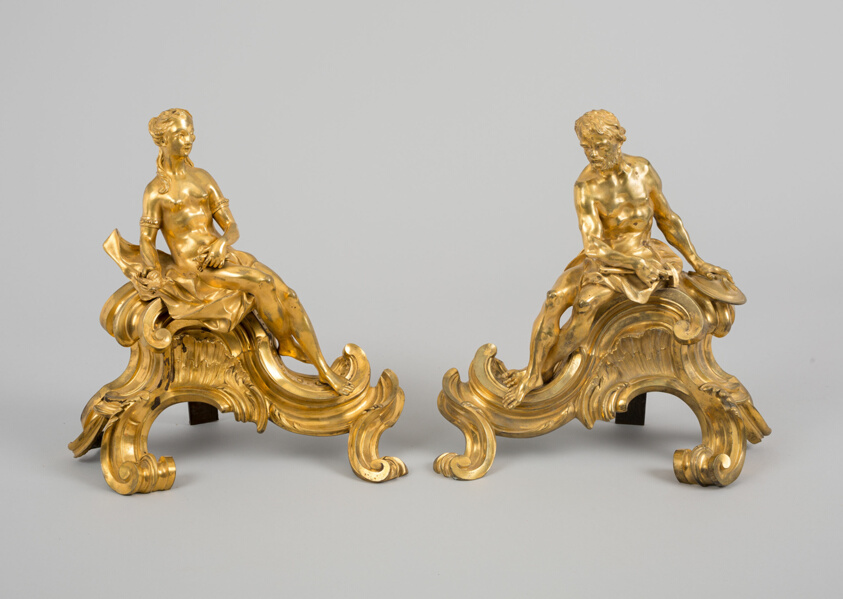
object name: Metalwork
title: Firedog: Venus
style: louis xv, european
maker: France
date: Mid 18th century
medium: Gilt bronze, iron supports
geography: France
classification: fireplace equipment; european decorative arts; metalwork